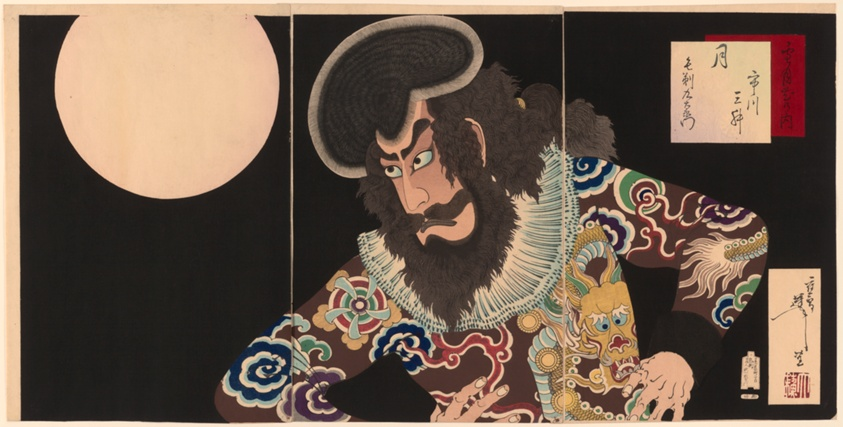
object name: Print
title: Ichikawa Danjūrō IX as Kezori Kuemon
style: Japanese (culture or style)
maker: Tsukioka Yoshitoshi (Japanese, 1839-1892)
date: About 1890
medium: Color woodblock prints; ōban triptych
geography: Japan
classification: woodblock print; print; asian art